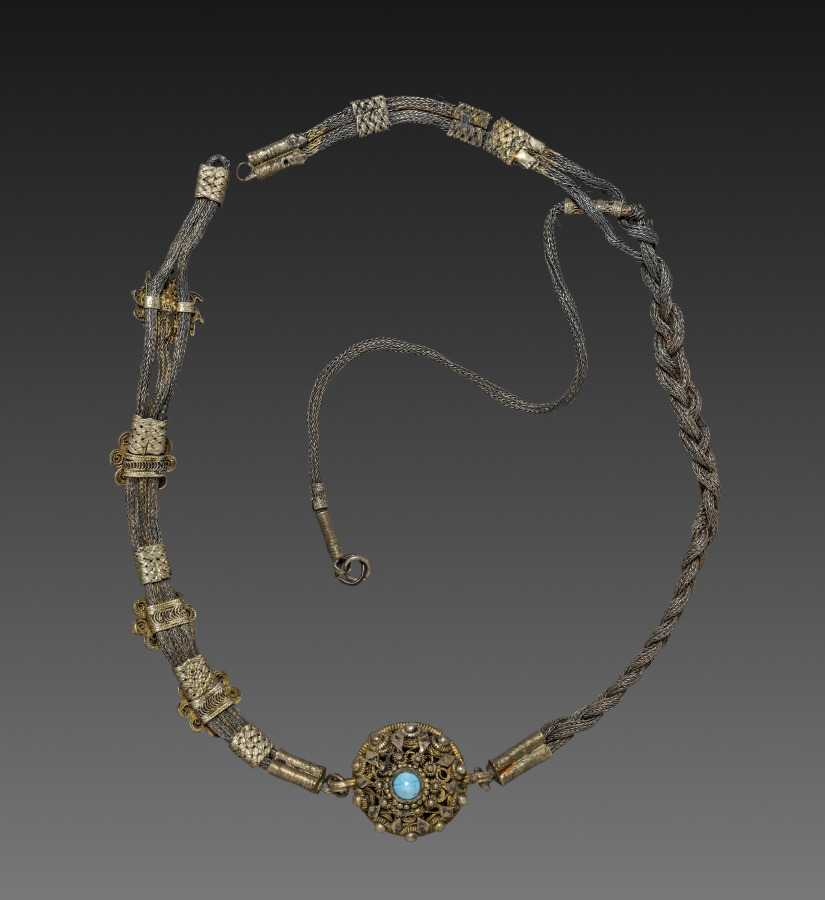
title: Man's Silver Chain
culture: Yugoslavia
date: 1800s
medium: silver and glass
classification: Jewelry